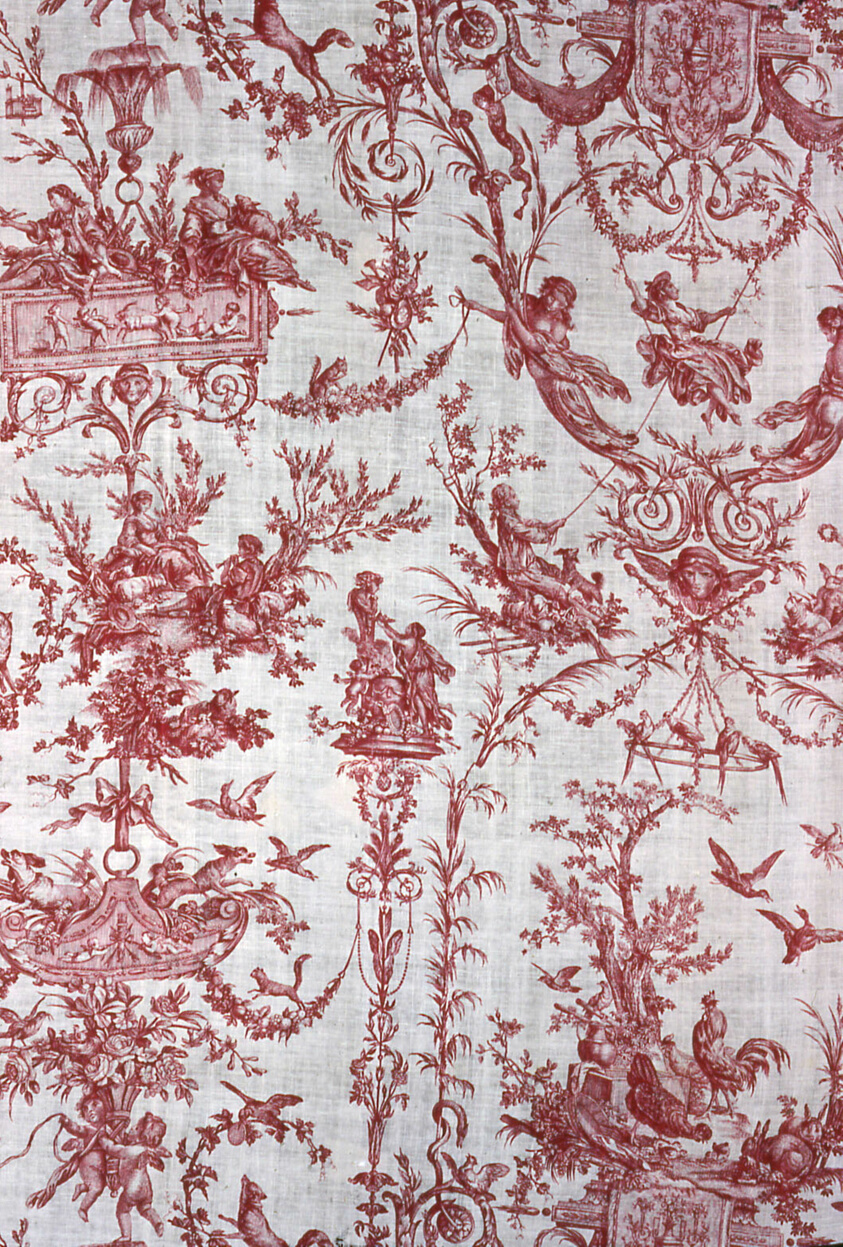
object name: Textile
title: L'Escarpolette (Furnishing Fabric)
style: jouy-en-Josas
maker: Designed by Jean Baptiste Huet (French, 1745–1811) and others after Jean Honore Fragonard (French, 1732-1806); Manufactured by Christophe-Philippe Oberkampf (naturalized French, 1738-1815), Oberkampf Manufactory (French, 1760-1843); Jouy-en-Josas, France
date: c. 1789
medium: Cotton, plain weave; copperplate printed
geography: Jouy-en-Josas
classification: textile; weaving - printed; furnishing textile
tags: dogs, animals